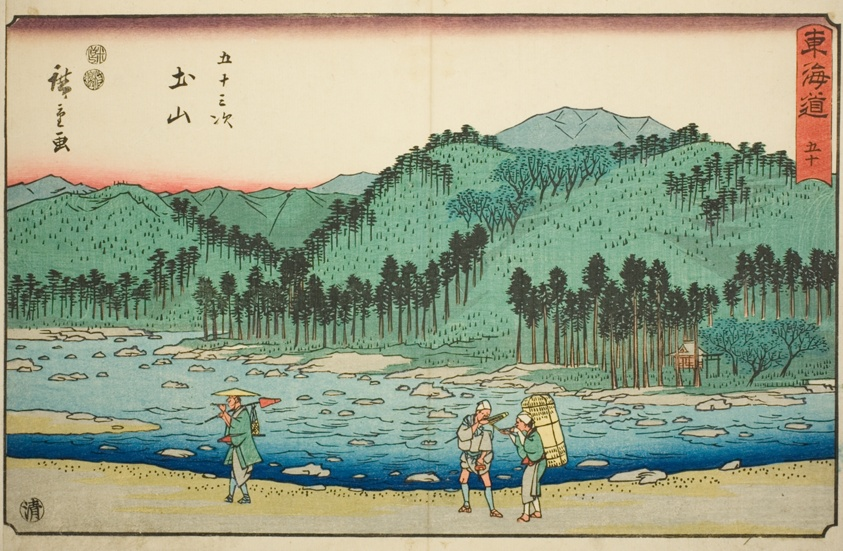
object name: Print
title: Tsuchiyama—No. 50, from the series "Fifty-three Stations of the Tokaido (Tokaido gojusan tsugi)," also known as the Reisho Tokaido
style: Japanese (culture or style)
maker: Utagawa Hiroshige 歌川 広重; Japanese, 1797-1858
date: c. 1847/52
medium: Color woodblcok print; oban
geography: Japan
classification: woodblock print; print; asian art